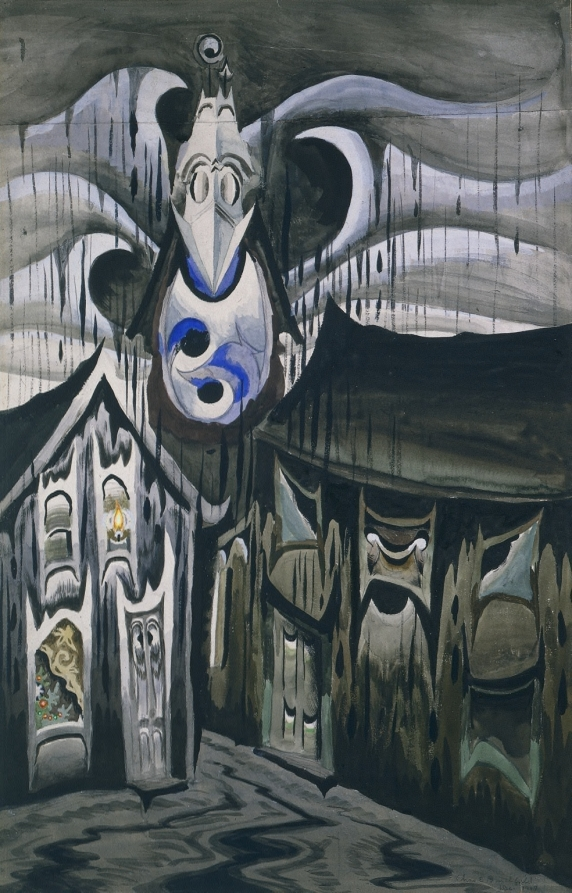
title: Church Bells Ringing, Rainy Winter Night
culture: America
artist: Charles Burchfield (American, 1893–1967)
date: December 1917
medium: watercolor and gouache over graphite on wove paper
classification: Drawing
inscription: signed, at lower right, in graphite: Chas E Burchfield / Dec. 1917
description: Burchfield considered this drawing among the greatest accomplishments of his “golden year.” This period followed a time of self-doubt and uncertainty: after graduating from the Cleveland School of Art, Burchfield enrolled in the National Academy of Design in New York City, but dropped out after one day, returning to Salem to work an office job. He painted inexhaustibly during his breaks and at night, depicting Salem and its environs in an increasingly abstract style. Church Bells Ringing, Rainy Winter Night shows the spire of Salem’s Baptist church rising up between two houses. Burchfield hoped to express his powerful childhood fear of the bell’s ominous ring—which he described as “a dull roar . . . dying slowly & with a growl.” Hearing it on stormy winter nights, he huddled in his bed and calmed himself by thinking of Christmas, a practice suggested by the tree visible through a window in the drawing. Burchfield carefully refined the composition throughout the sketches seen in this gallery. The drawing’s mood is conveyed through gray tones and the buildings’ hulking forms. Burchfield also created a complex language of symbols entitled “Conventions for Abstract Thoughts,” that recurred throughout his work and represented universal emotions. The hooked forms surrounding the tower stood for “Fear,” for example, and the shapes of the houses’ doors and windows symbolize “Morbidness” and “Evil.” Developed fully in this drawing, these symbols dominated Burchfield’s work during the remaining several years he spent in Ohio.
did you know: Salem's Baptist Church, a central feature of Burchfield's composition, has since been destroyed by fire.